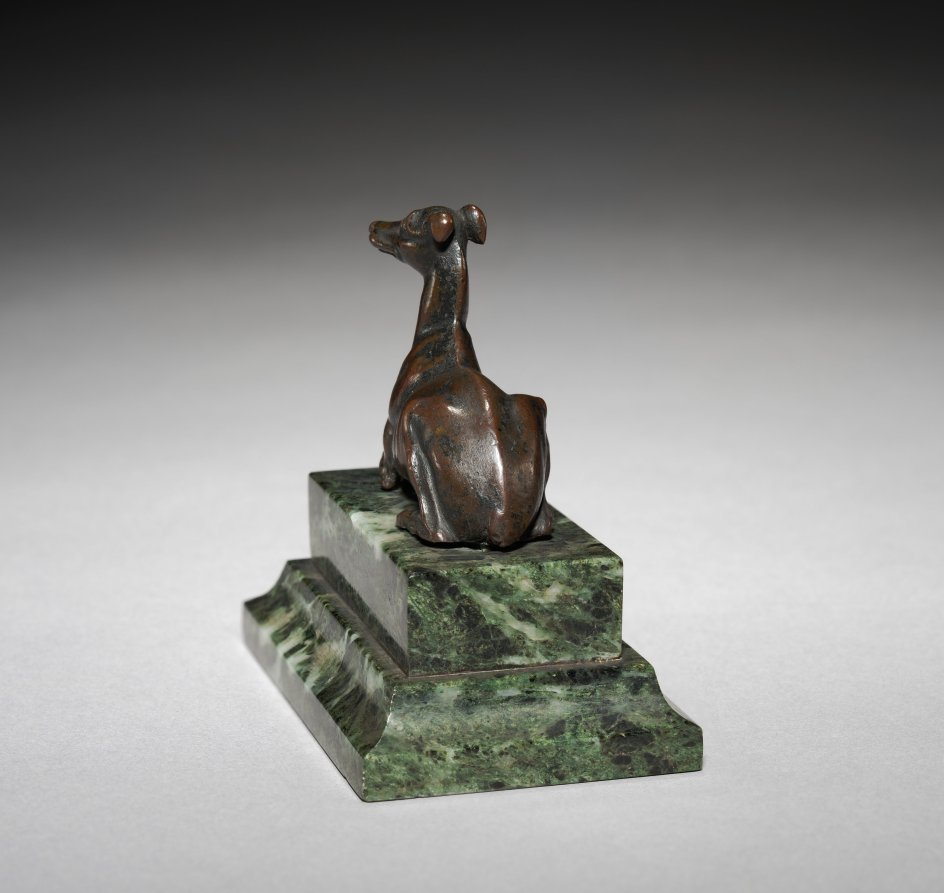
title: Whippet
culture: France, 19th century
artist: Pierre Jules Mène (French, 1810–1879)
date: c. 1825 – 1879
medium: bronze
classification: Sculpture